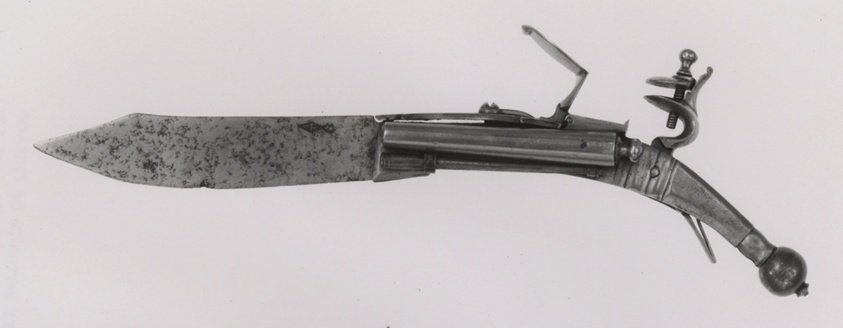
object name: Arms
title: Combined Double-Barreled Flintlock Pistol and Folding Knife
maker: European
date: 18th century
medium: Steel, wood, brass, iron, and gold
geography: Sweden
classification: combination weapon; arms; arms and armor